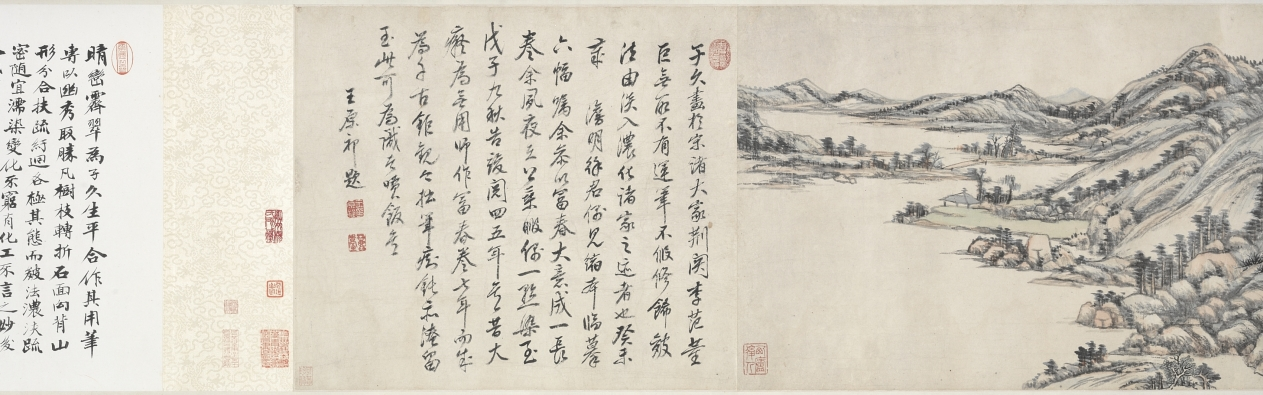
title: Green Peaks under Clear Sky: After Huang Gongwang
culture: China, Qing dynasty (1644-1911)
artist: Wang Yuanqi (Chinese, 1642–1715)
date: 1703–8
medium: handscroll; ink and light color on paper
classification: Painting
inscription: 晴巒霽翠：倣黃子久。麓臺。[印]石師道人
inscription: [印] 御書畫圖留與人看. 子久畫於宋諸大家荊、關、李、范、董、巨，無所不有。運筆不假修飾。皴法由淡入濃，化諸家之迹者也。澹明徐君偶見縮本，臨摹六幅。囑余參以富春大意，成一長卷。余夙夜在公，乘暇偶一點染。至戊子九秋告竣，閱四、五年矣。昔大癡為無用師作富春卷，七年而成，為千古鉅觀。今拙筆癡鈍。亦淹留至此。可為識者噴飯矣。王原祁題。[印]王原祁印; 麓臺 [印, 畫芯左下] 西廬後人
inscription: 3 additional colophons and 15 additional seals: 1 colophon and 9 seals of Yang Shicong 楊士驄 (b. 1870); 1 colophon of Wu Hufan 吳湖帆 (1894–1968); 1 colophon and 1 seal of Wu Mei (20th c.); 5 seals of Cheng Qi 程琦 (1911–1988).